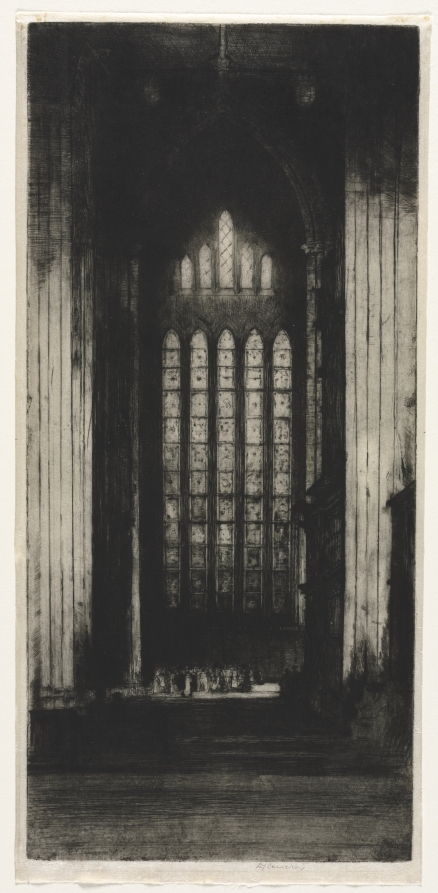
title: The Five Sisters, York Minster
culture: England, 20th century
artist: David Young Cameron (British, 1865–1945)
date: 1907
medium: etching and drypoint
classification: Print